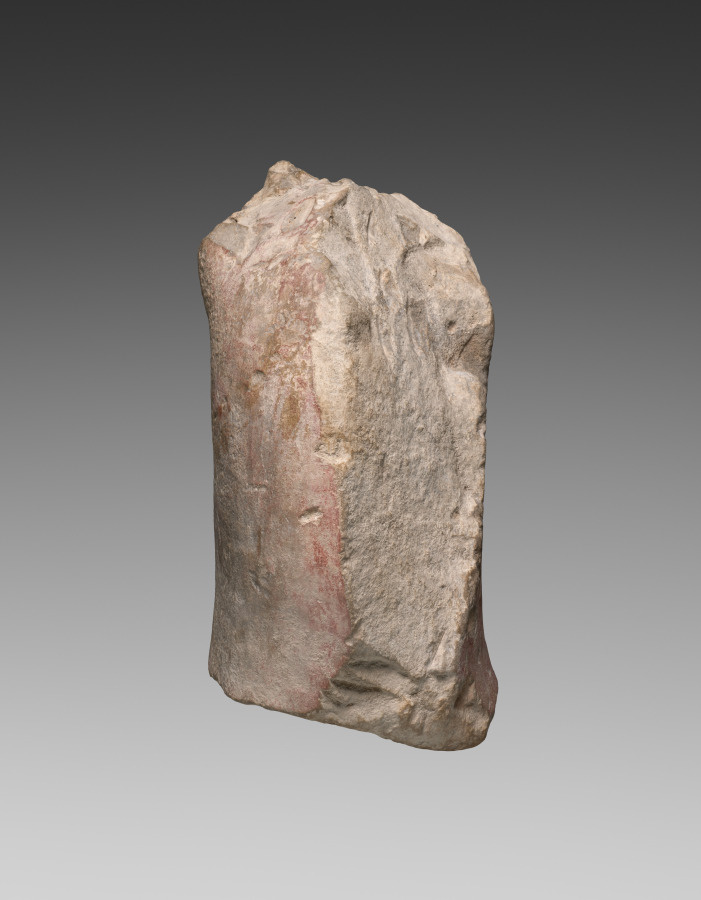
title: Fragment of a Goat's Head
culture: Greece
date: c. 500–475 BCE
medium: limestone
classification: Sculpture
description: Initially identified as a horse head, this fragmentary sculpture, once painted reddish-brown, has a beard, indicating that it depicts a goat. Its large size, however, together with its neck position and unusual round eye, have all prompted questions. Was the head broken from a rearing goat? Or did it represent Pan, the rustic shepherd god often depicted as half-man, half-goat? If Pan, some scholars have connected it with a fifth-century BC Athenian sanctuary erected to thank the god for aid in battle. An alleged provenance near the Athenian Acropolis supported this idea, but scientific tests suggest otherwise.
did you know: Pan, the goat-headed god, is often called a son of Hermes, but sources disagree.